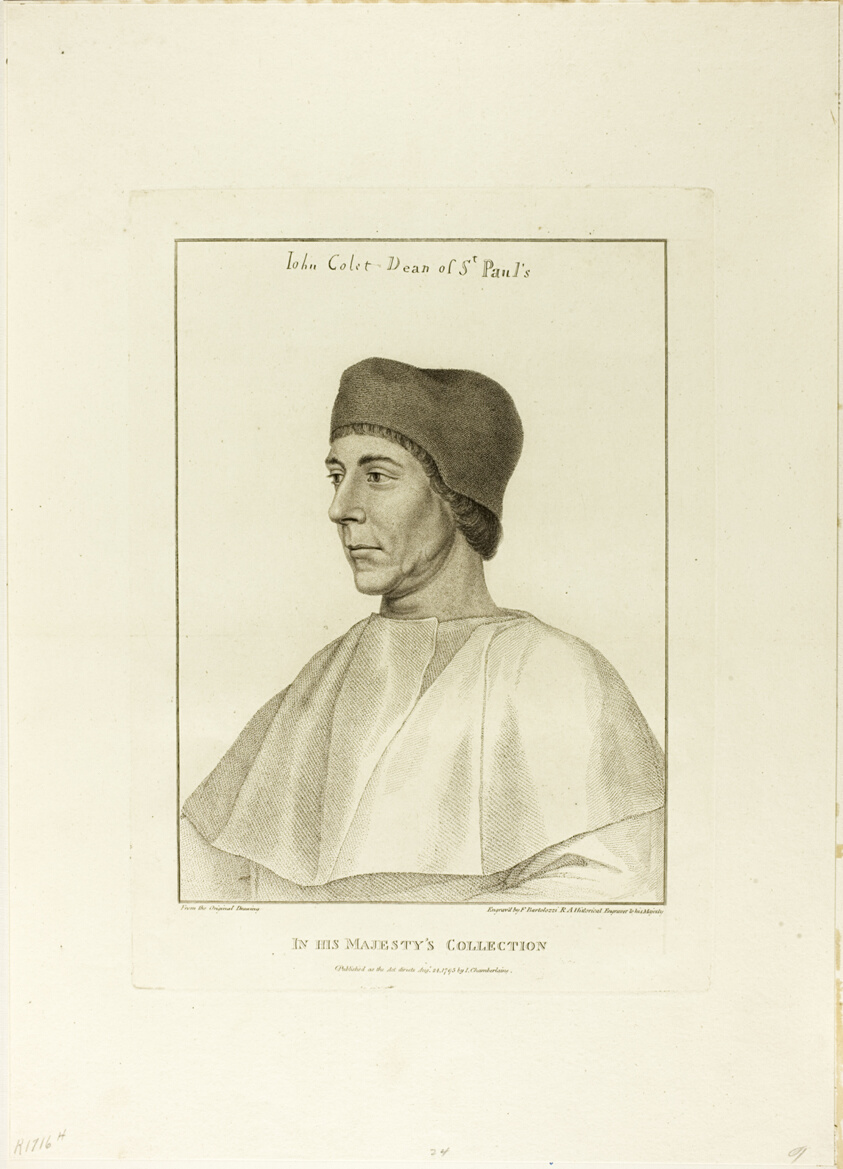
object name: Print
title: John Colet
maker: Francesco Bartolozzi (Italian, 1727-1815); after Hans Holbein the younger (German, 1497-1543)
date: August 24, 1795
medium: Stipple engraving on ivory wove paper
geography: Italy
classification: engraving; print; prints and drawing